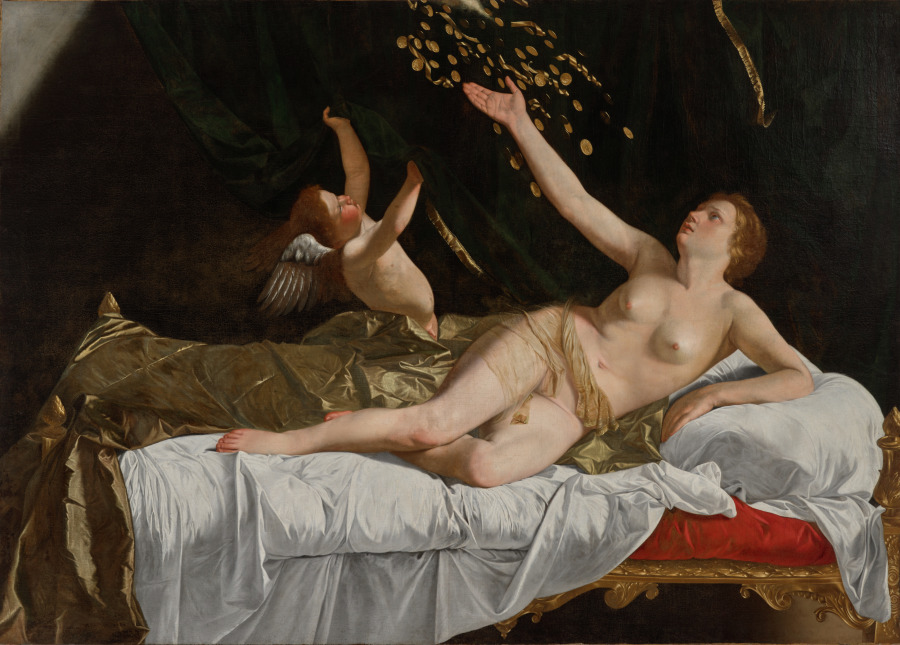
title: Danaë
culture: Italy, 17th century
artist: Orazio Gentileschi (Italian, 1563–1639)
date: c. 1623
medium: oil on canvas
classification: Painting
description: Danaë’s father feared a prophecy that his grandson would kill him, so he imprisoned his daughter to protect her from suitors. Yet Jupiter, king of the gods, fell in love with Danaë, and he came to her in the form of gold streaming from the sky. Gentileschi adopted Caravaggio’s method of painting directly from models, pulled to the front of the picture plane, which gives the painting a startling, tangible quality. However, the graceful way he handled paint and human gestures lends the work a poetic quality unique to the artist.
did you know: The gauzy scarf draped over Danaë was a studio prop present in many of Orazio's paintings.